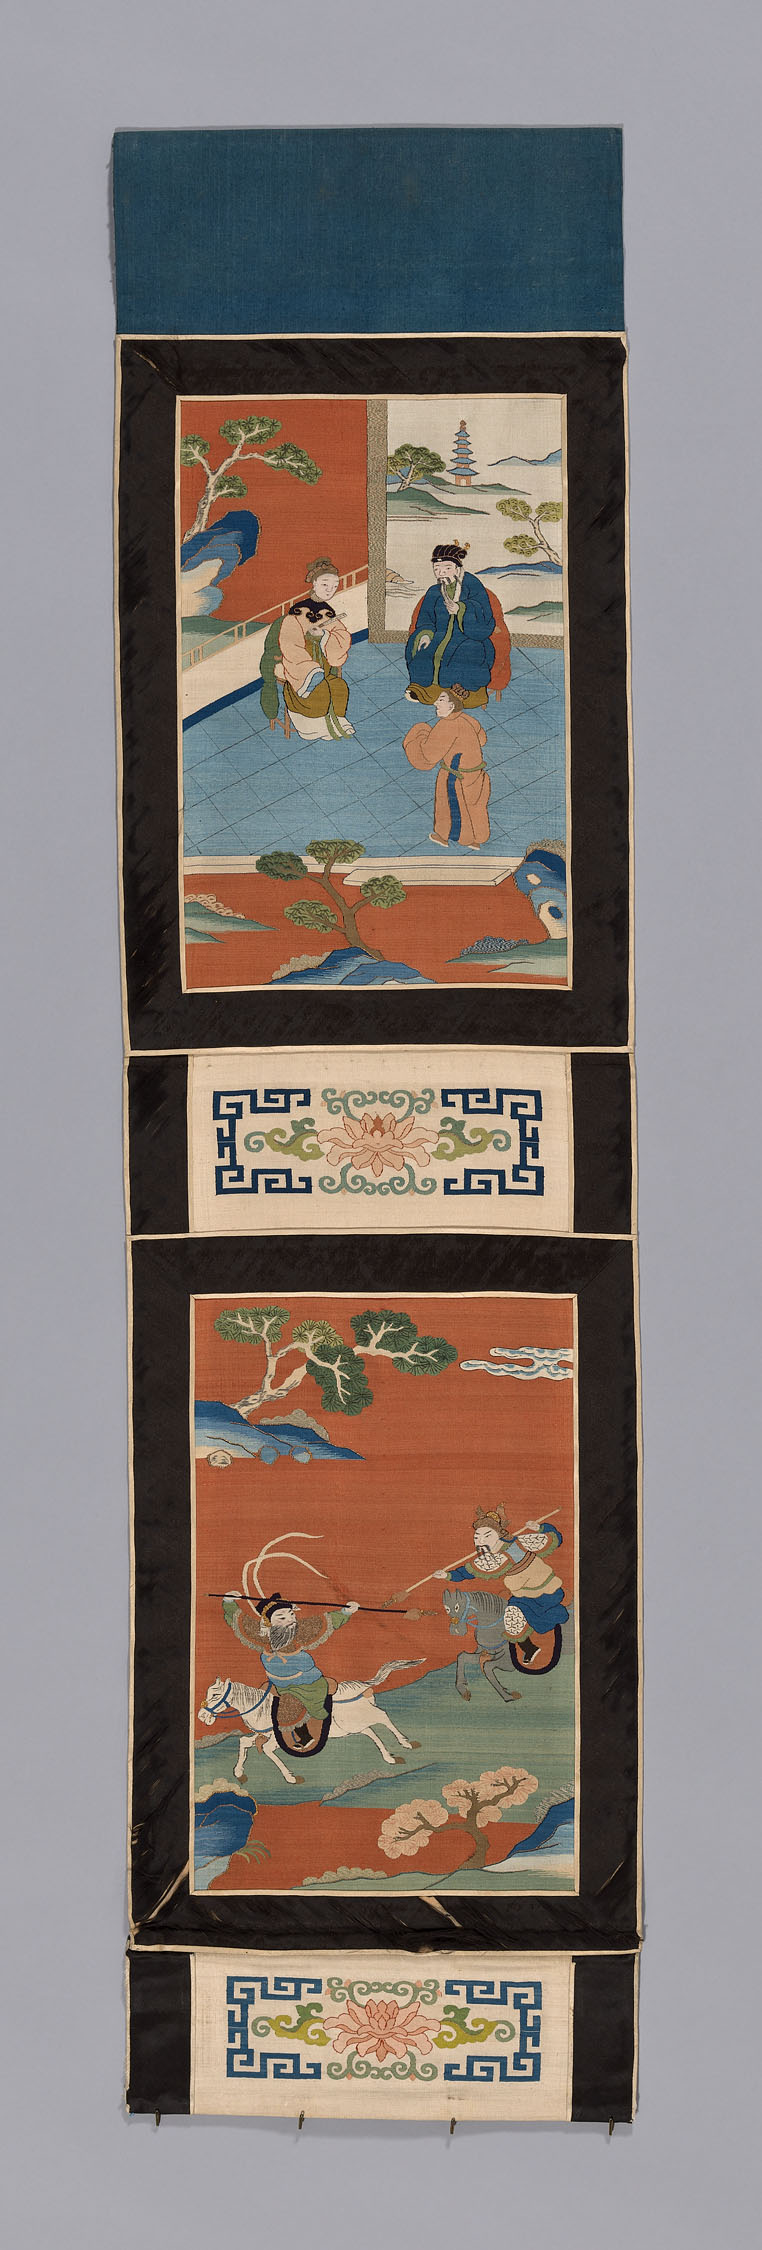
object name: Textile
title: Panel (For a Screen)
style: qing, Chinese (culture or style), asian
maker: China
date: Qing dynasty (1644–1911), 1875/1900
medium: Silk, gold-leaf-over-lacquered-paper-wrapped silk, slit tapestry weave with extended weft and interlaced outlining wefts; painted; borders: silk and cotton, warp-float faced 5:1 satin weave; inner and outer edges: silk, warp-float faced 4:1 satin weave; lining: cotton, plain weave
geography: China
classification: weaving - tapestry; weaving; textile